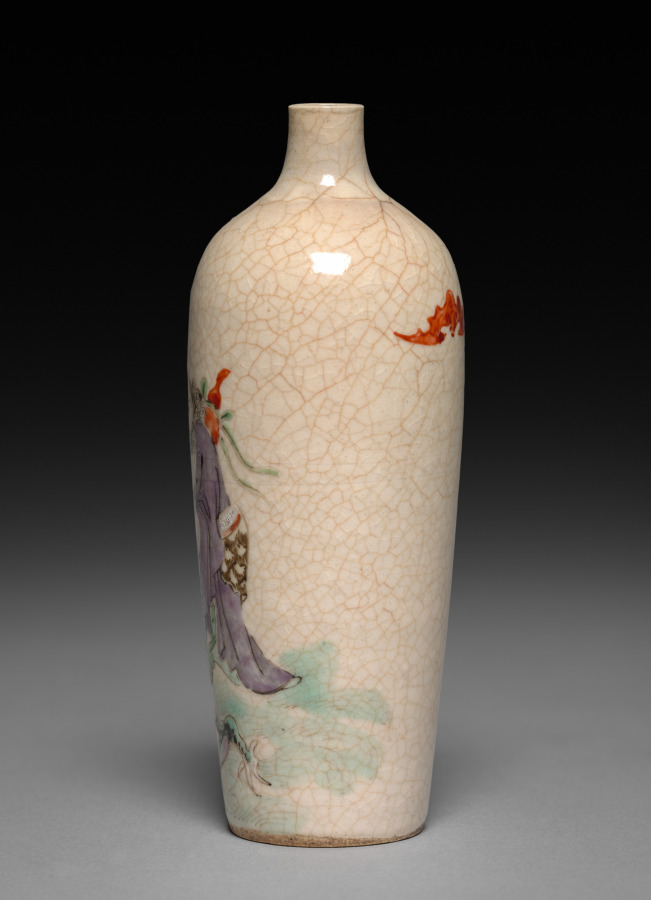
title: Snuff Bottle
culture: China, Qing dynasty (1644–1911), Qianlong reign (1736–95)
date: 1736–95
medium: porcelain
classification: Ceramic